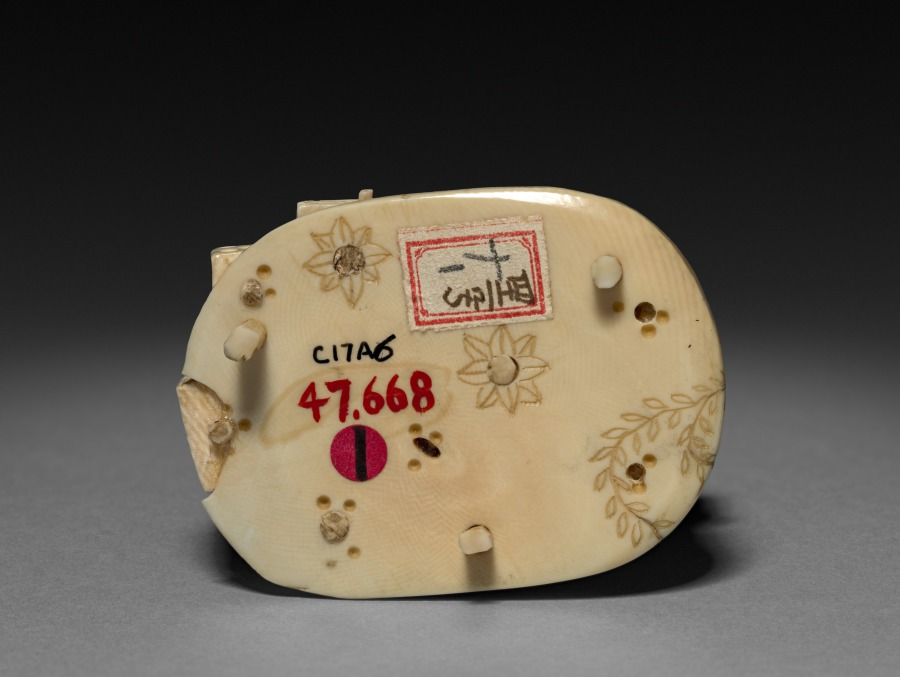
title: Man with Dice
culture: Japan, Edo period (1615–1868) to Meiji period (1868–1912)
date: 1800s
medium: ivory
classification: Netsuke